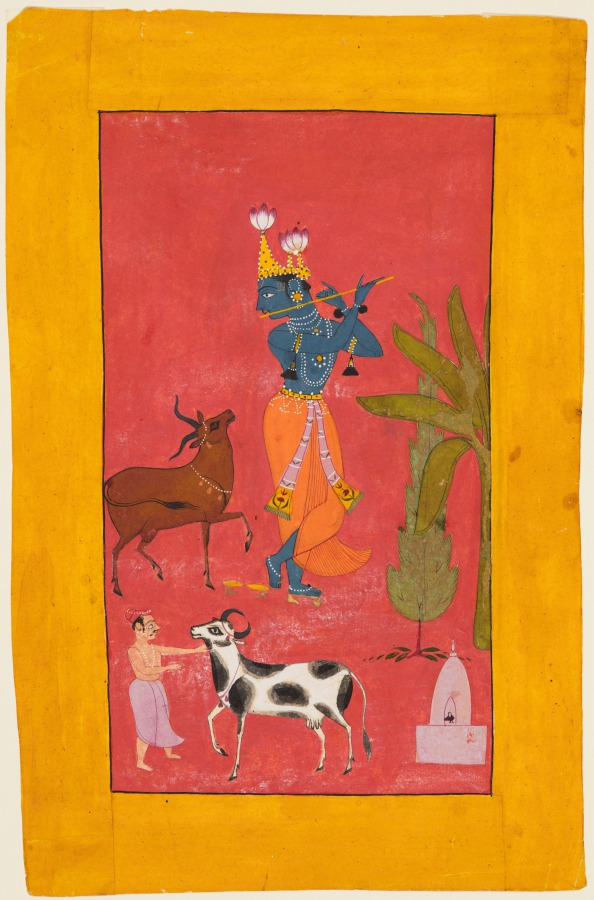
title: Krishna Fluting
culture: Northwestern India, Rajasthan, Rajput Kingdom of Bundi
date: c. 1675–1700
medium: Gum tempera on paper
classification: Painting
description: Brilliantly set off against a flat red ground, Krishna’s blue body is the focus of the brown cow, lured to the god by the melody of his flute. Even the plantain and cypress trees seem to point in his direction. The figural style of the artists of this Rajput kingdom effortlessly shows the head turned in one direction, while the feet point the opposite way, contributing to Krishna’s superhuman appearance. Below, a herdsman struggles to manage a spotted cow in front of a temple with a linga, a stylized phallic form that identifies the presence of the Hindu god Shiva. This fluting scene refers to Krishna’s coming of age as a cowherd.